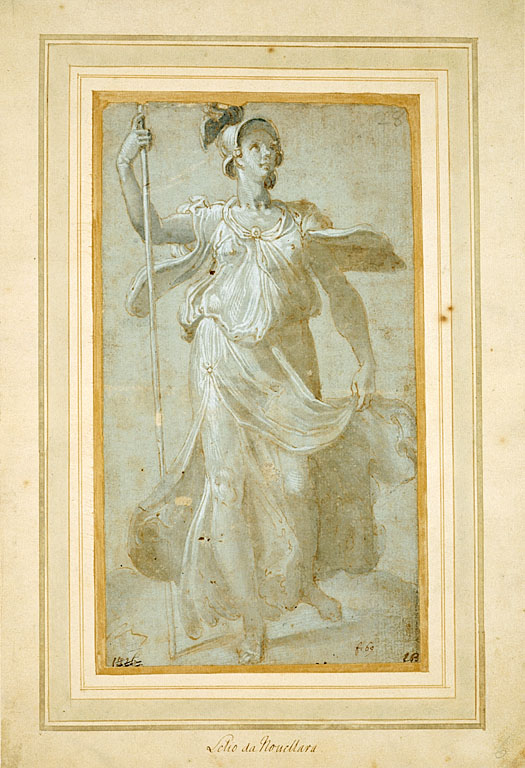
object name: Drawing and Watercolor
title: Full-Length Draped Figure of Woman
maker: Circle of Federico Zuccaro (Italian, 1540/42-1609)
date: 1580/1600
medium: Pen and brown ink, brush and blue wash, heightened with lead white, on blue laid paper, laid down on cream wove card, laid down in album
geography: Italy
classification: pen and ink drawings; drawings (visual works); prints and drawing